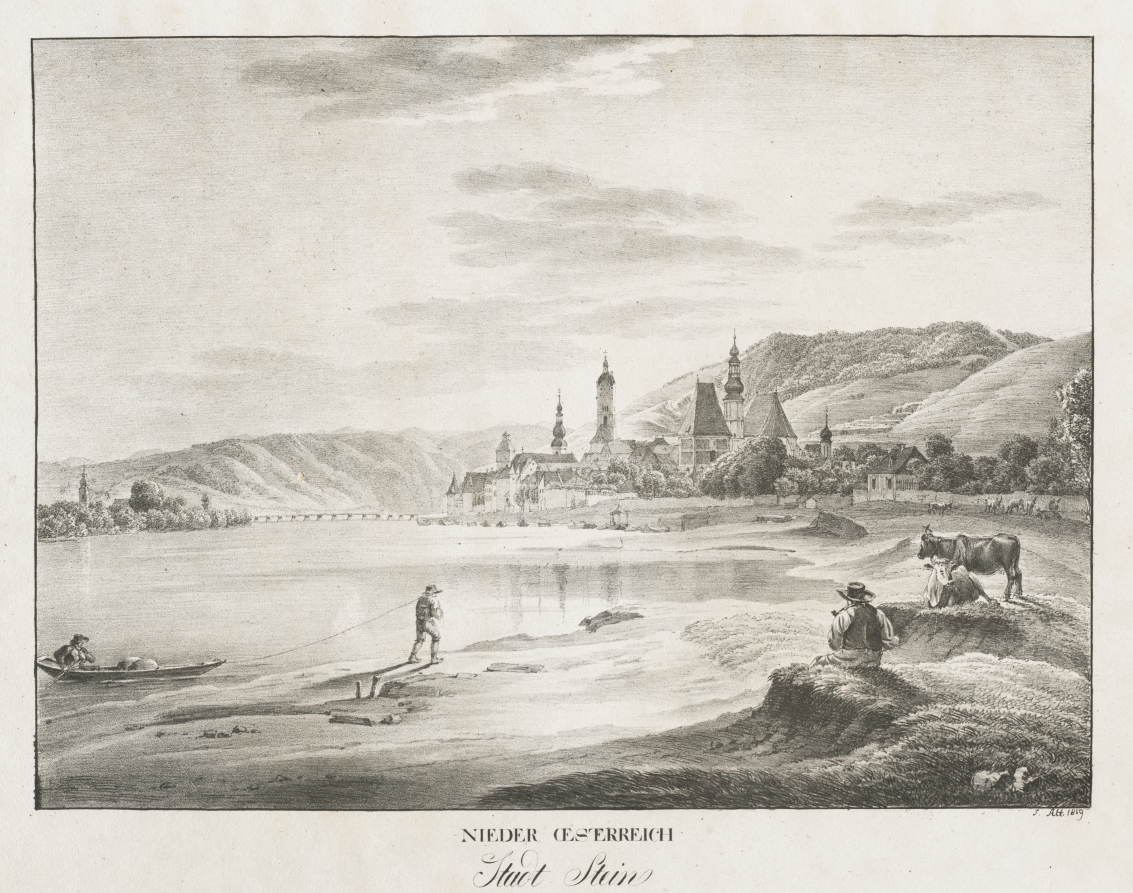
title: Nieder-oesterreich, Stadt Stein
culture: Austria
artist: Jakob Alt (Austrian, 1789–1872)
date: 1819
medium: lithograph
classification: Print